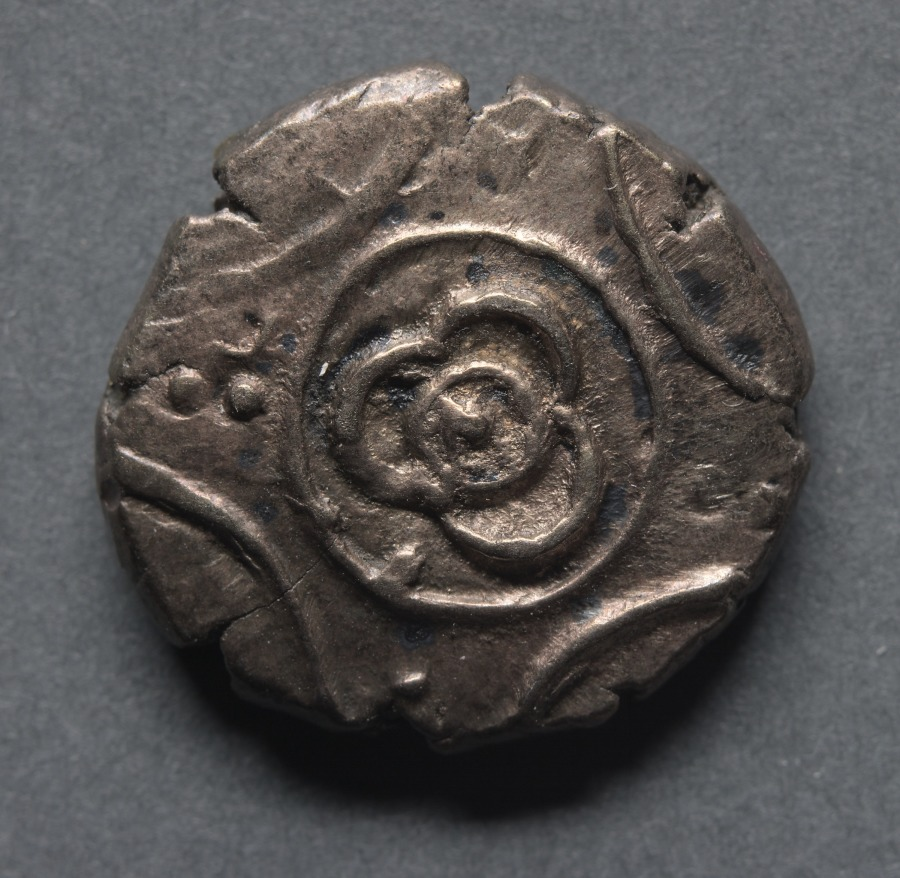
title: Stater: Three-Petal Flower (obverse); Horse and wheels (reverse)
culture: England, Iceni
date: 20 BCE–10 CE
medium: gold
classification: Coins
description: The Iceni were a native tribe inhabiting Norfolk, Suffolk, and parts of Cambridgeshire. They were described by the Romans as powerful, unbroken by war. In AD 61 the king of the Iceni, Prasutagus, died, leaving his apparently considerable wealth to his two daughters and to the Roman Emperor, as joint heirs. However, while the Roman legions under Aulus Plautius were in Wales taking drastic steps to exterminate Druidism, Boadicea, the widow of Prasutagus, was ill-treated by the Romans and her two daughters were outraged. The Iceni rose in revolt and helped by their neighbors the Trinovantes, they overran the Roman settlements. It is said that 70,000 Romans were massacred at Camulodunum, and the Iceni, with Boadicea in a war chariot at their head, sacked and burned Verulamium (St. Albans, Hertfordshire), and London. Suetonius, one of the leading Roman generals, returned from the west with all possible speed and came up with the Iceni in the northwest of Roman London. Here a great battle was fought, resulting in a complete victory for the disciplined Roman forces; thousands of Britons were killed. The site of this battle is supposed to have been near what is now Kings Cross, in central London, commemorated by Battle Bridge Road.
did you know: The obverse design may be a rose, a flower that appears on many earlier, mostly Greek, coins.